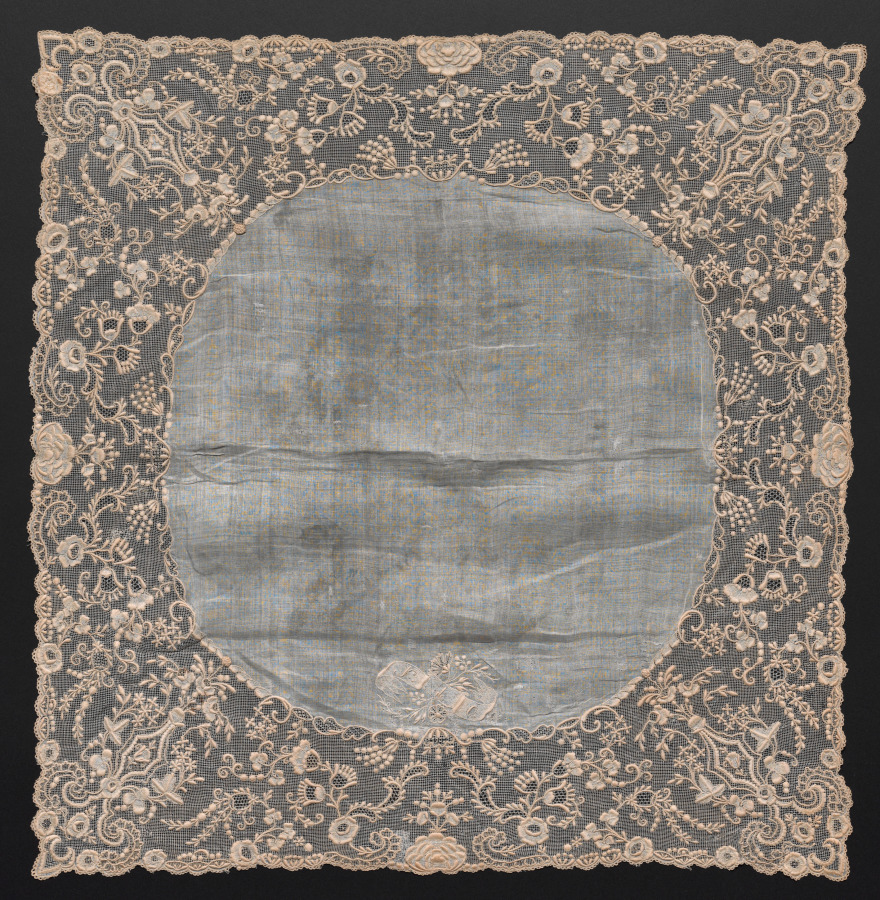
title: Lace Handkerchief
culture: France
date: 1800–1825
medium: Plain weave linen center: needle lace (drawnwork) edging and embroidery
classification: Embroidery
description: The initials N. de O. are embroidered in one corner of this handkerchief.